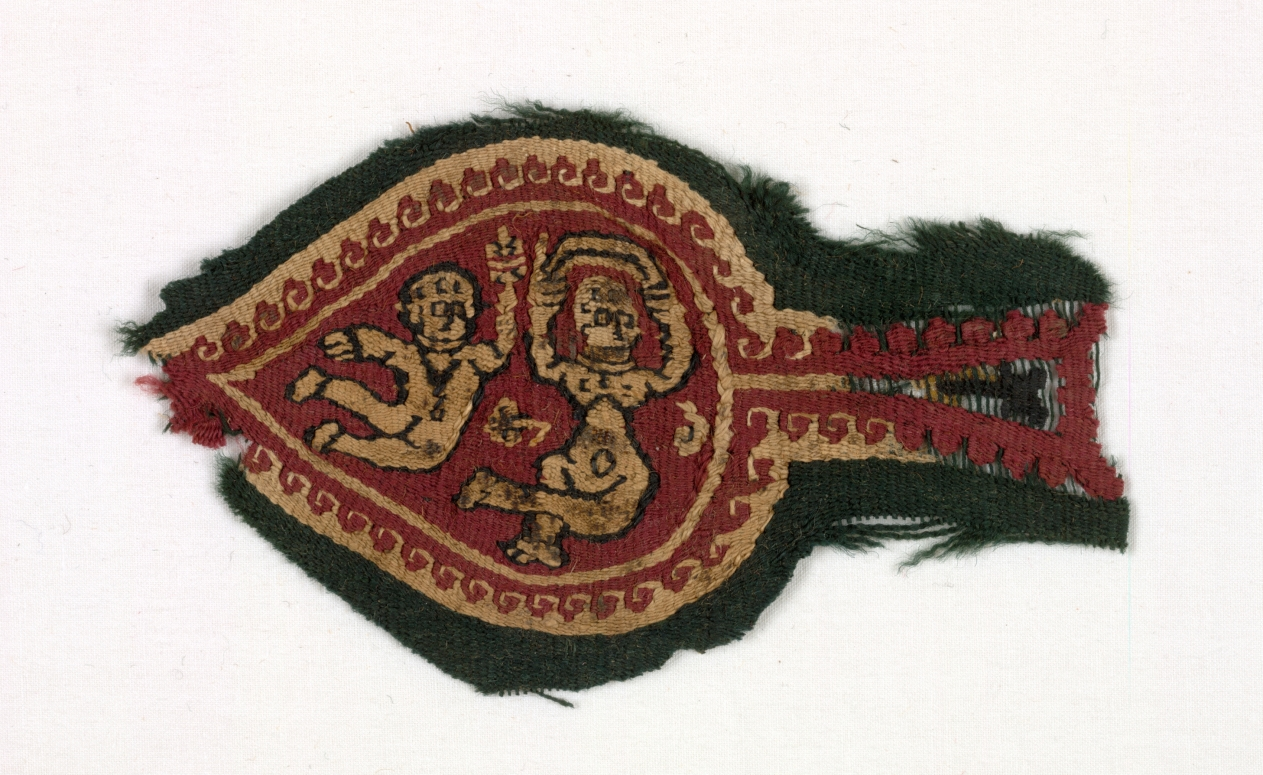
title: Spade-shaped Terminus of a Clavus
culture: Egypt, Byzantine period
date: 400s - 600s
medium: tapestry; linen and wool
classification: Textile